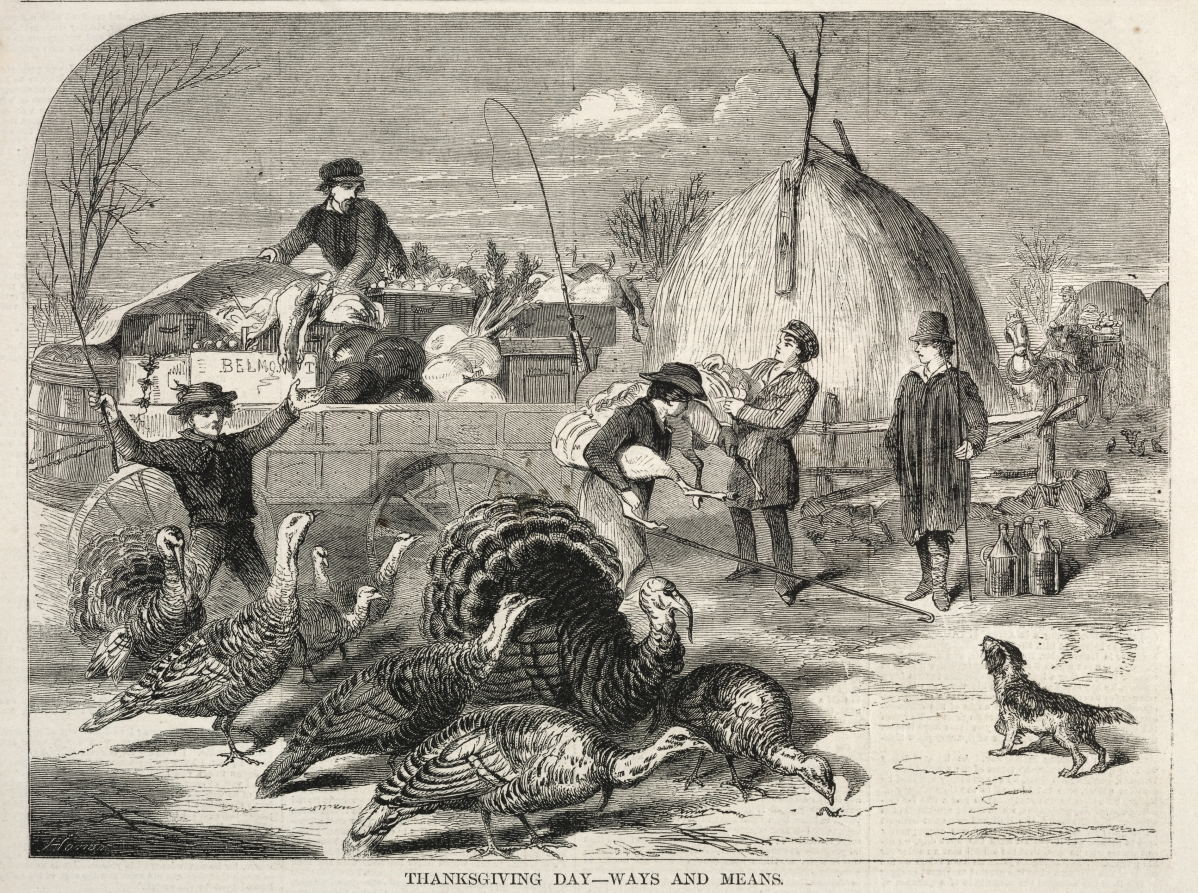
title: Thanksgiving Day - Ways and Means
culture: America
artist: Winslow Homer (American, 1836–1910)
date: 1858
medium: wood engraving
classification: Print